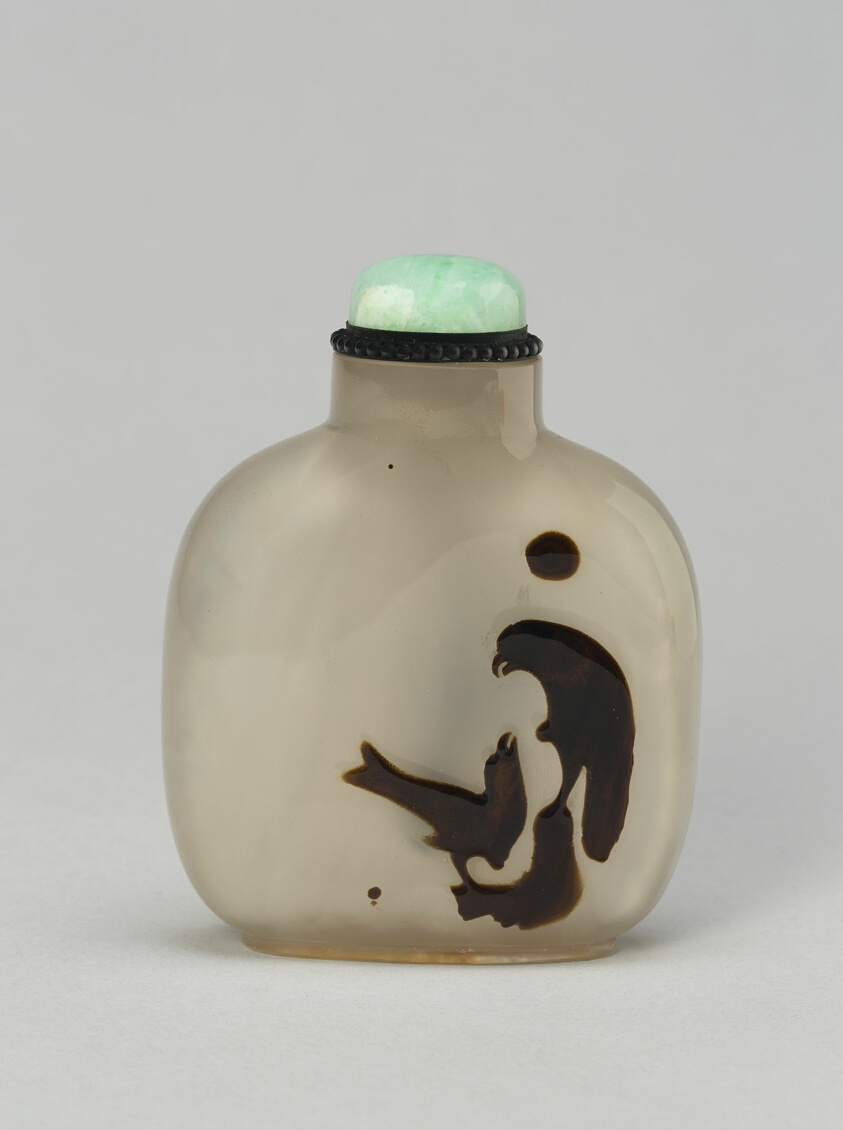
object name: Vessel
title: Snuff Bottle with Two Hawks on Rockwork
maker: China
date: Qing dynasty (1644–1911), 1800–1900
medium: Shadow agate with carved decoration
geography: China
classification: snuff bottle; asian art; vessel